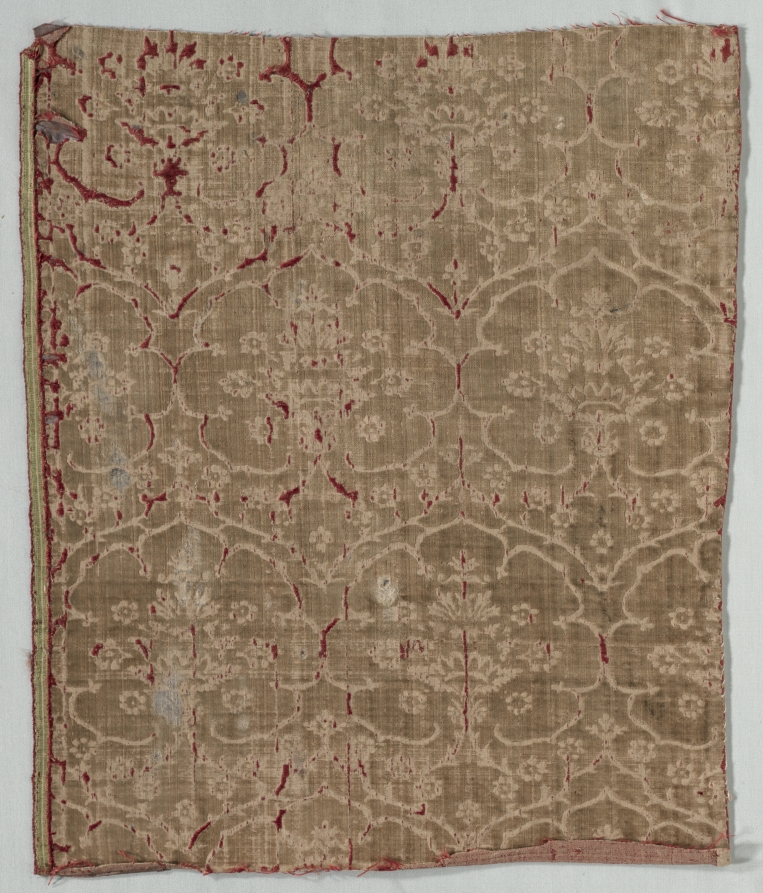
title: Velvet Fragment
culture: Italy, 15th century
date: 1400s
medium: velvet (cut and voided)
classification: Velvet